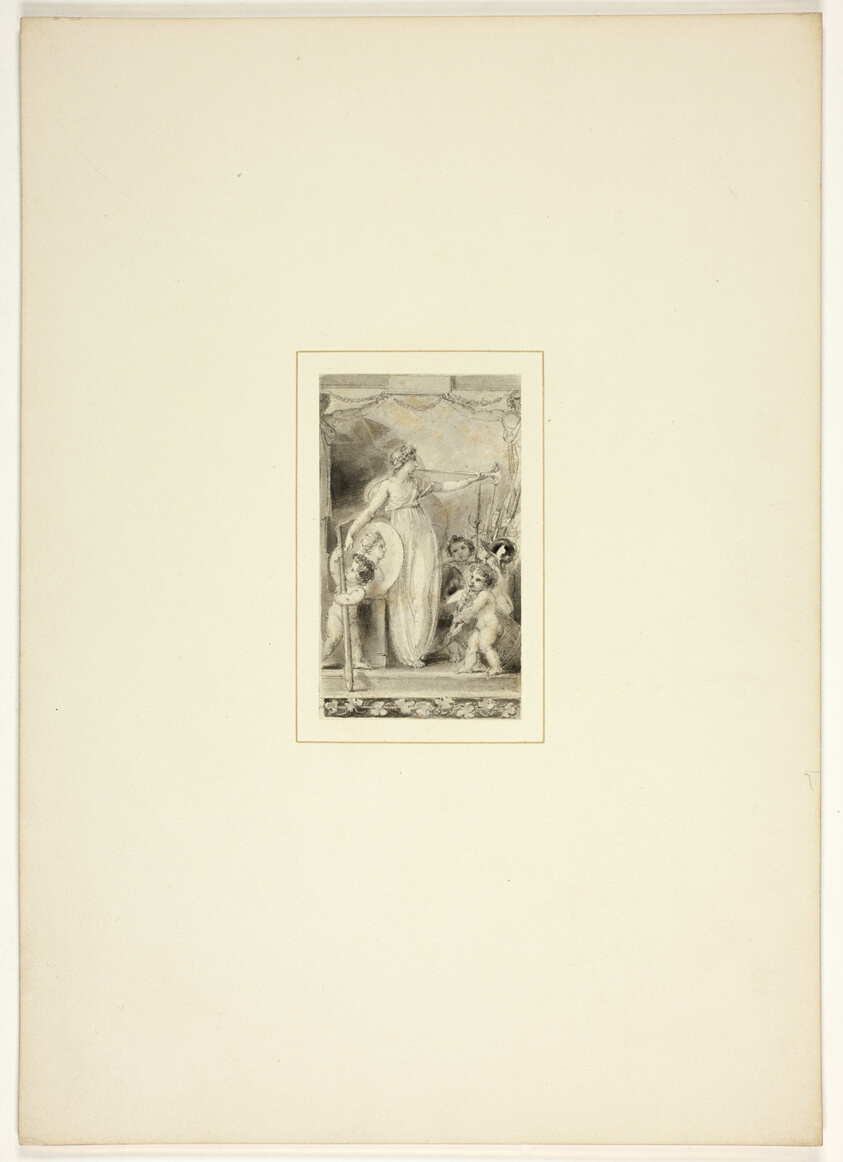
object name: Drawing and Watercolor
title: Study for a plate from The Task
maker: Thomas Stothard (English, 1755-1834)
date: c. 1800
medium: Ink wash on paper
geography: England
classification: ink or chalk wash; drawings (visual works); prints and drawing